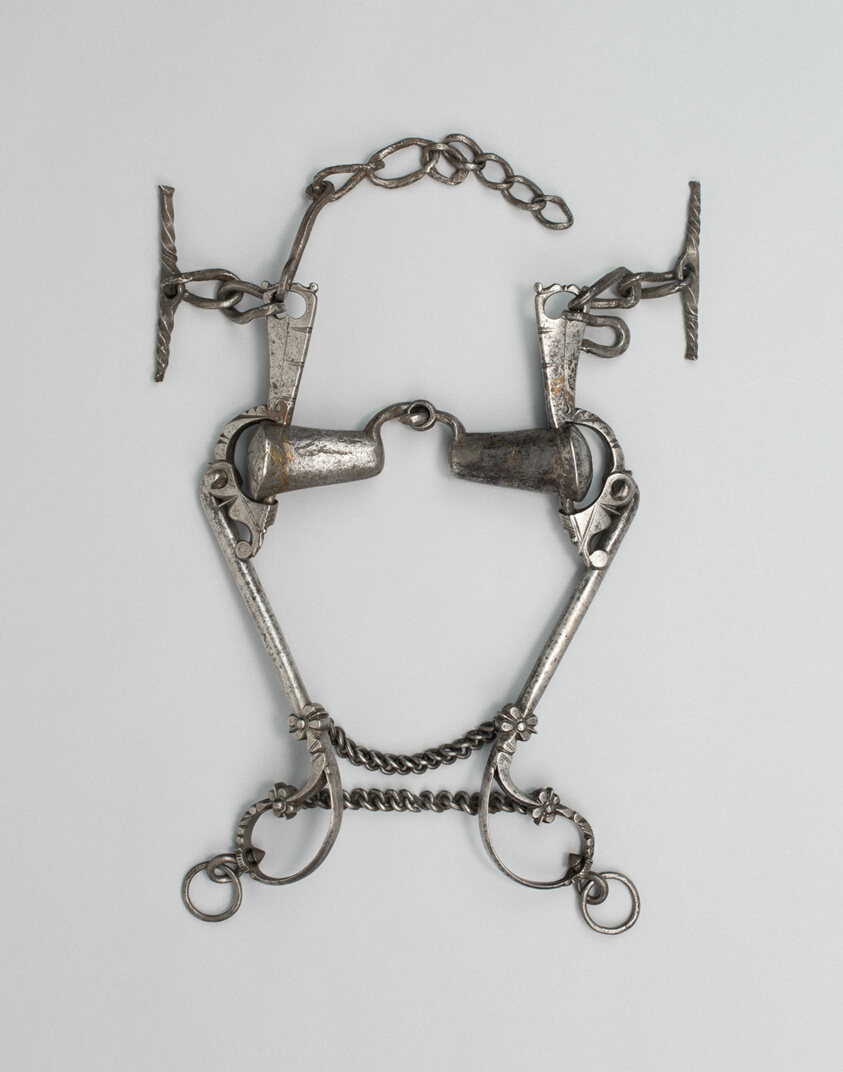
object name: Armor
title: Curb Bit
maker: European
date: 16th century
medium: Iron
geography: Europe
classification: horse equipment; armor; arms and armor